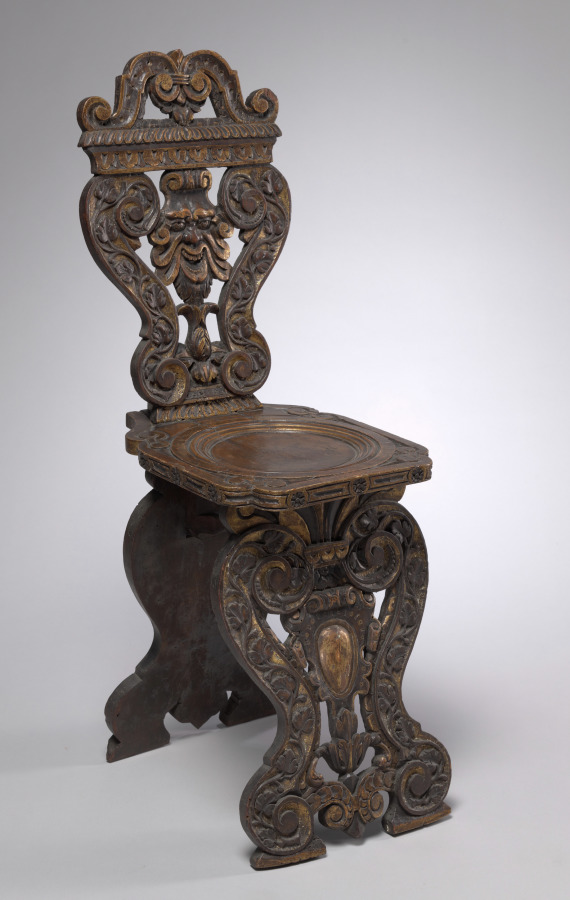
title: Chair, Sgabello type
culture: Italy, late 16th century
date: late 1500s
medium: walnut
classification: Furniture and woodwork